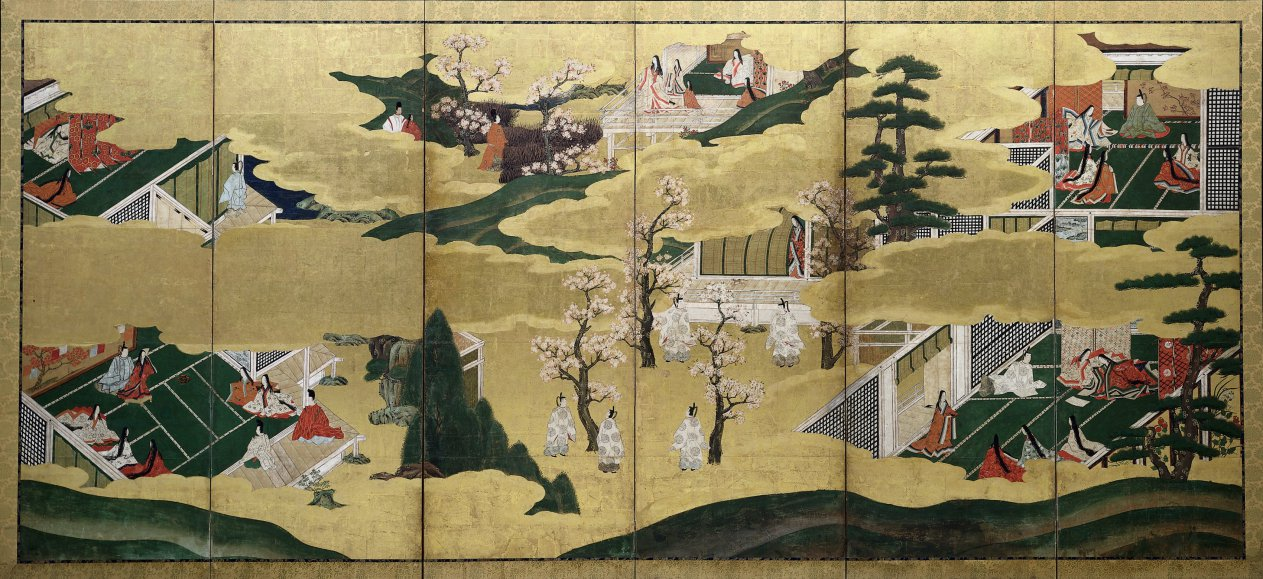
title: Scenes from the Tale of Genji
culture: Japan, Edo period (1615–1868)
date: late 1700s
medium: One of a pair of six-panel folding screens; ink and color on gilded paper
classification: Painting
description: Folding screens served as temporary dividers in traditional Japanese open-plan architectural spaces. This pair was inspired by Japan’s most celebrated work of literature, the Tale of Genji, written by Murasaki Shikibu, an attendant to the empress in the early 11th-century imperial court. The novel follows the love life of the “Shining Prince” Genji and delves into the psychological states of his many companions. Distinct episodes are nestled within a matrix of golden clouds and landscape elements. Each screen includes six episodes presented in a nonlinear fashion, capturing scattered highlights of the story.